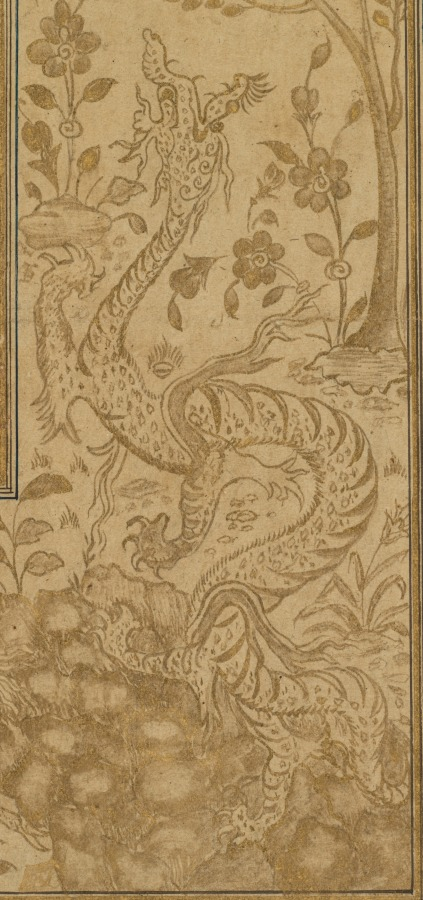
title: Portrait of Murad Bakhsh (1624–61)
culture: Mughal India, court of Shah Jahan (reigned 1628–58)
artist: attributed to Balchand (Indian, active 1595–c. 1650)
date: c. 1635; borders c. 1700s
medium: gum tempera and gold on paper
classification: Painting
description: The miniature portrait of a Mughal prince is now mounted on an album page. Originally, it was in a gemstone setting as a “portrait jewel” to be worn by family and supporters at court. India’s ruling elite had been wearing portrait jewels since Sir Thomas Rowe (about 1581–1655) presented British portrait miniatures and cameos to the Mughal emperor as part of a diplomatic gift in 1616, when he successfully negotiated for British access to India’s ports.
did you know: This portrait belonged to a cousin of Sir Winston Churchill.